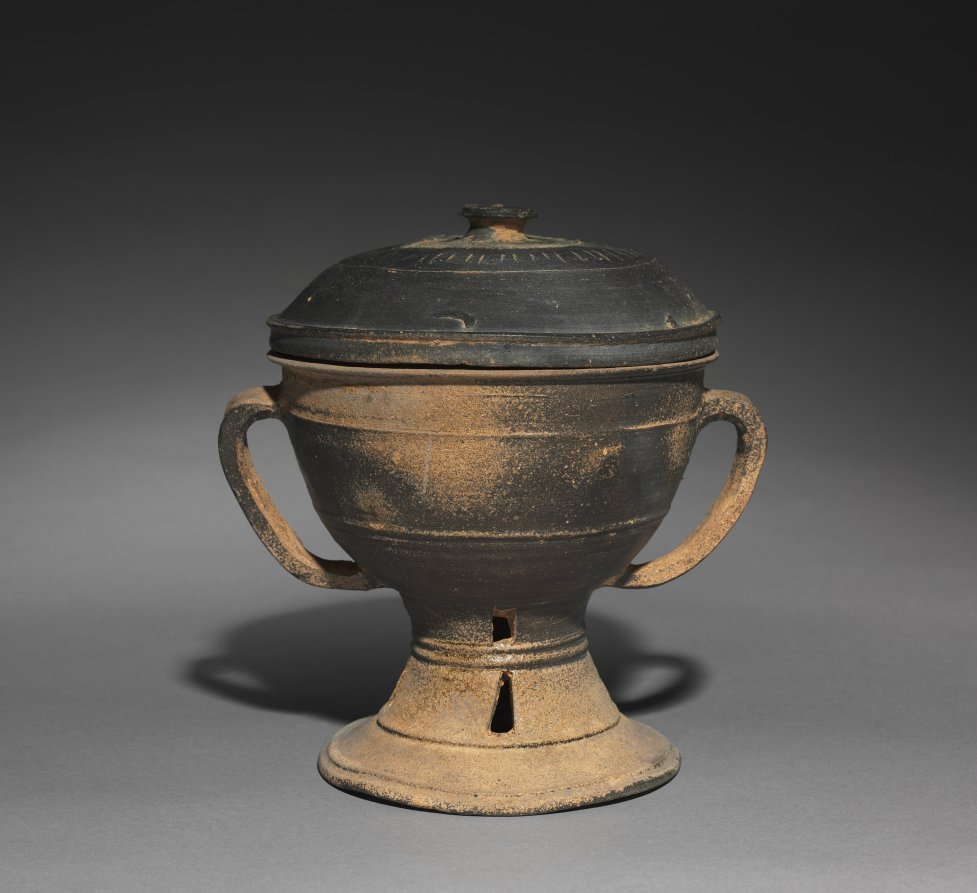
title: Lidded Cup with Strap Handles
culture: Korea, Gaya period (42–562 CE)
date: 300s–400s CE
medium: stoneware with natural ash glaze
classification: Ceramic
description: Pottery vessels with a footed stand such as this one is the earliest known high-fired ware. Its gray color is the result of the reduction of oxygen in the closed kiln chamber. Footed vessels were not for everyday usage, but rather served to present offerings to the deceased.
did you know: A series of triangular cutouts shown on the bottom are standard features of Kaya pottery.